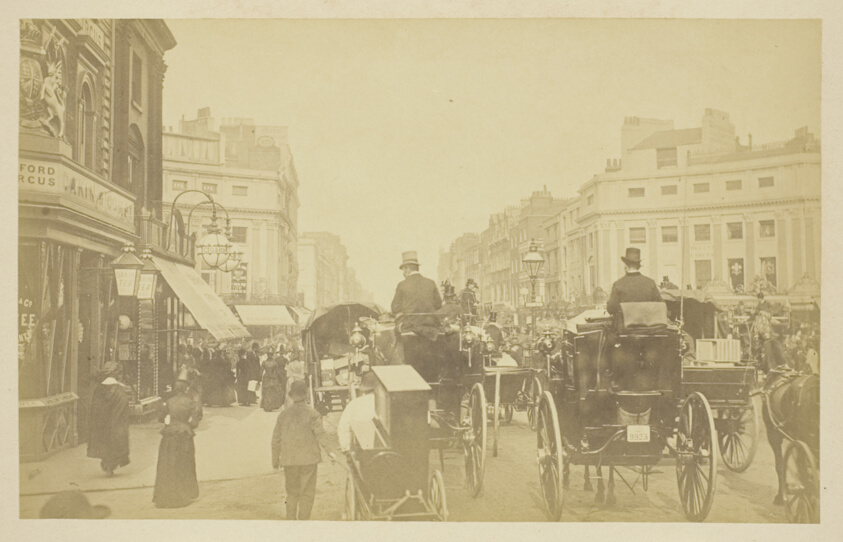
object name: Photograph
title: Regent Circus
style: 19th century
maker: Artist unknown; probably English, 19th century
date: 1850–1900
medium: Albumen print, from the album "Views of London"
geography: England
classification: albumen silver print; photographic process; photography; photograph